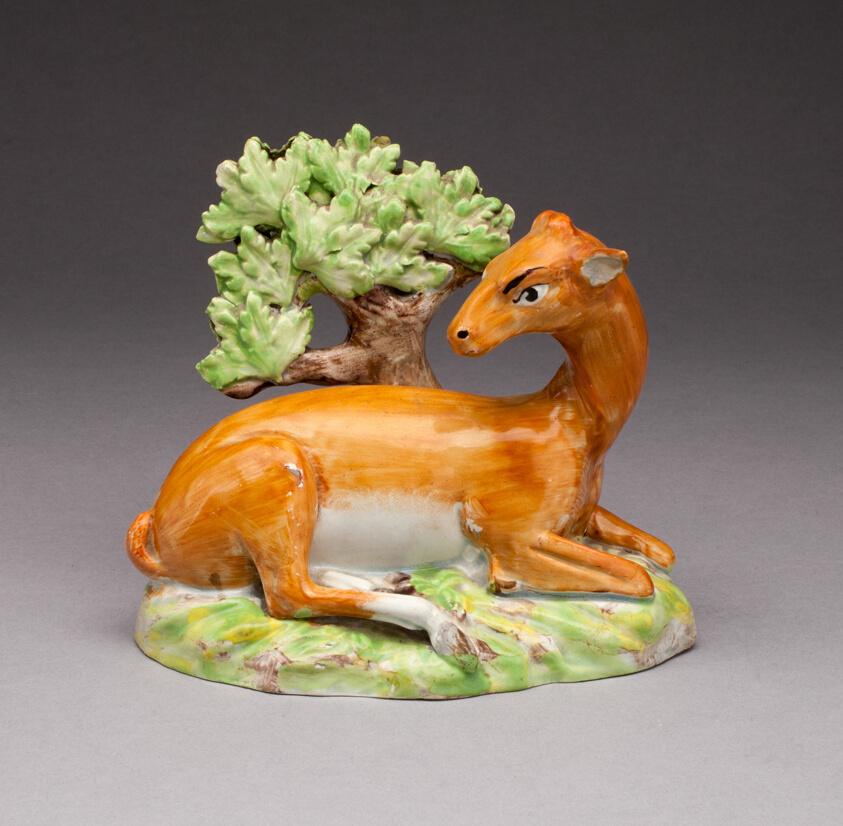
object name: Ceramics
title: Doe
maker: England, Staffordshire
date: c. 1820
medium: Lead-glazed earthenware, polychrome enamels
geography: Staffordshire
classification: earthenware; european decorative arts; ceramics; lead-glazed earthenware